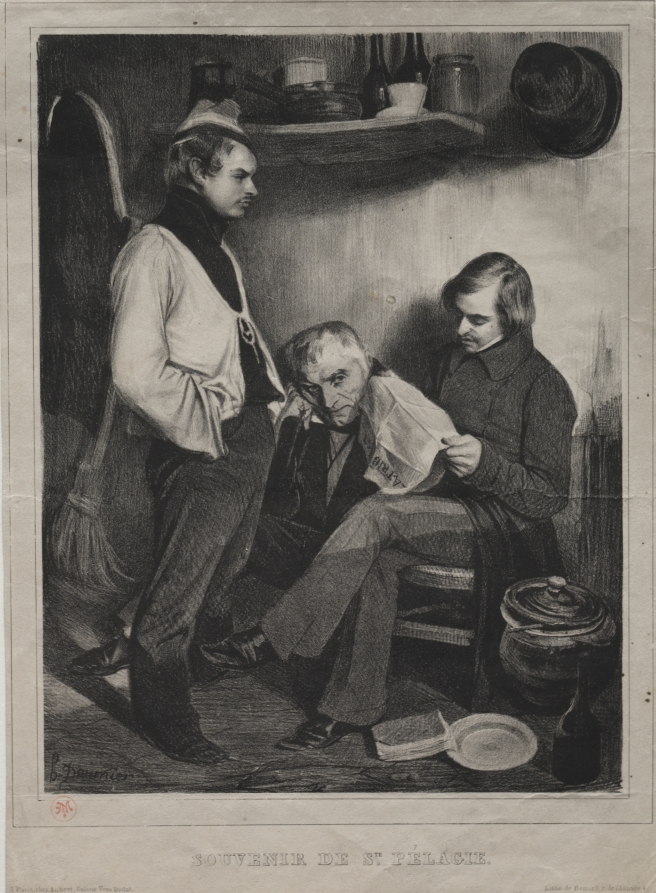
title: Souvenir of the Prison ot Ste. Pélagie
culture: France, 19th century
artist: Honoré Daumier (French, 1808–1879)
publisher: Aubert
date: 1834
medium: lithograph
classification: Print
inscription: Lower margin, printed: A Paris, chez Aubert, Galerie Vèro-Dodat / Litho de Benard, r. de l'Abbaye 4 ; in pencil: 629B ; red stamp: R.R.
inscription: Below image, printed: SOUVENIR DE STE. PÉLAGIE.